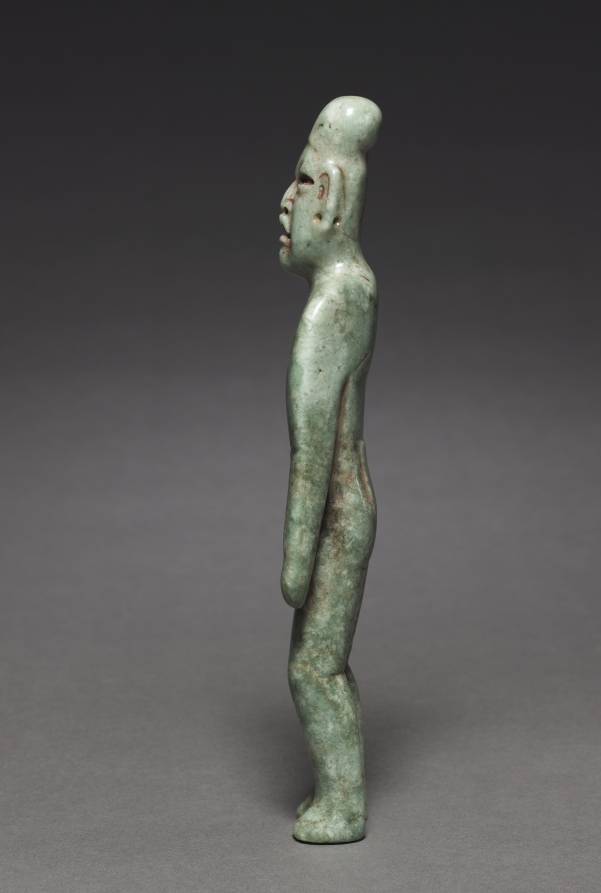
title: Standing Figurine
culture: Mesoamerica, Mexico, Olmec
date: 1900s(?)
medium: polished jadite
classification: Sculpture